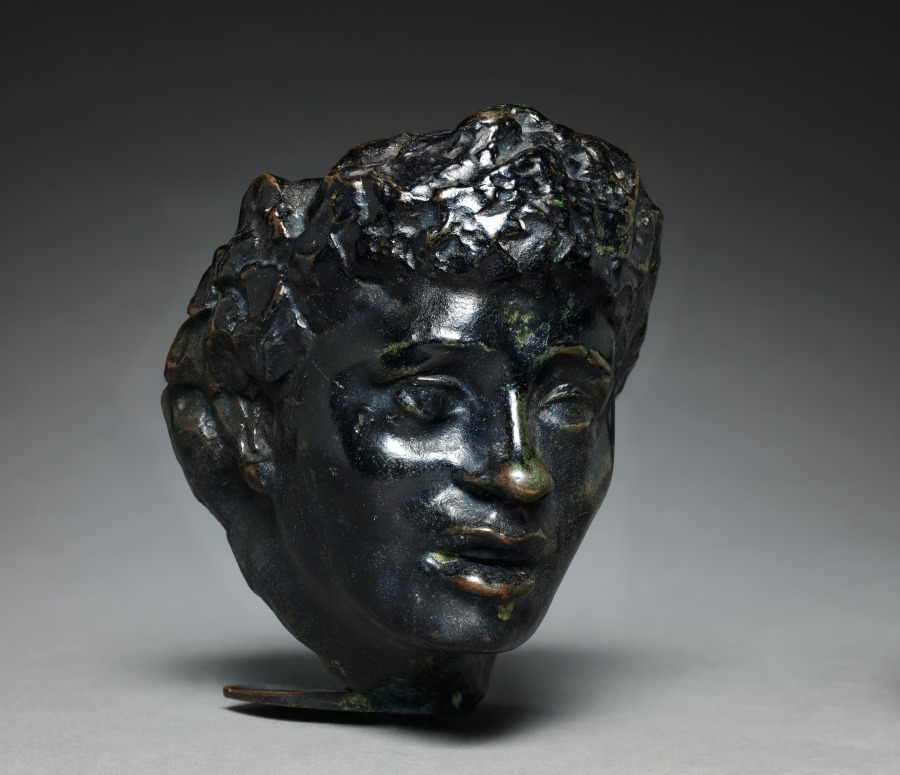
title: Mask of Séverine (Caroline Rémy)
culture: France, 19th century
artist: Auguste Rodin (French, 1840–1917)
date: 1893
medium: bronze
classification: Sculpture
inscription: Signed sinister side of neck: "A. Rodin"; inside dexter side in relief: "A. Rodin"